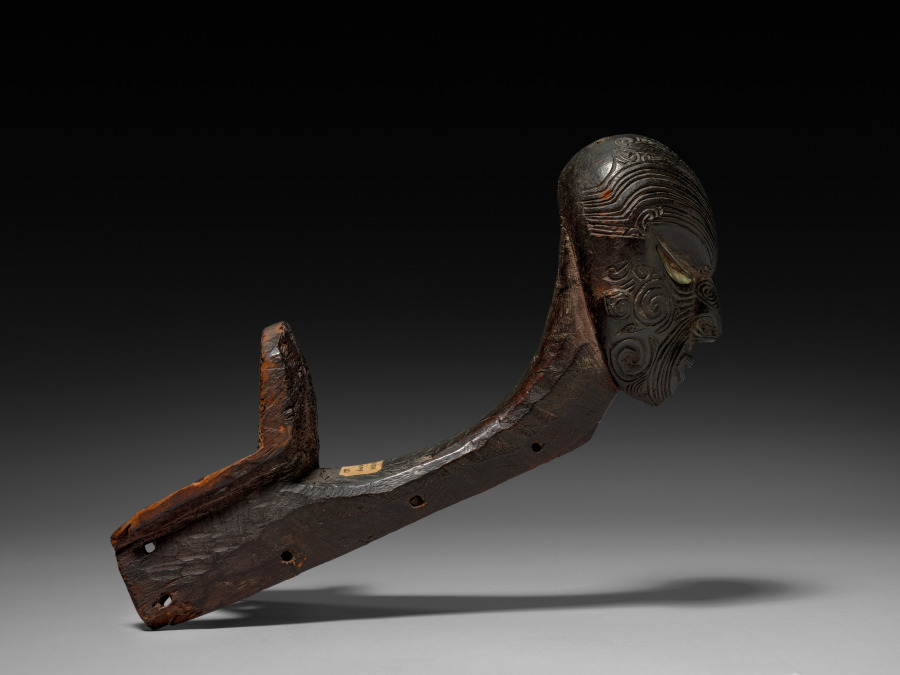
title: Fishing Canoe Prow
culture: Polynesia, New Zealand, Maori people, 19th century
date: 1800s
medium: wood with haliotis (pearl) shell inlay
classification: Sculpture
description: Intricate surface patterning characterizes Maori wood carvings. The swirls and spirals covering the face on this canoe prow replicate traditional facial tattoo patterns. Similar designs were used for post and gable figures that adorned both dwellings and compounds.